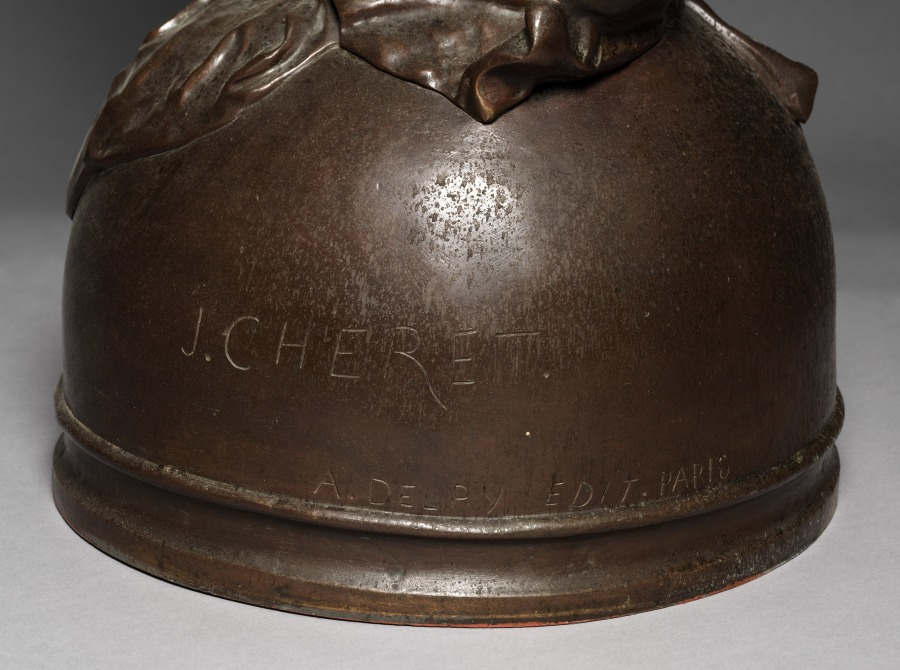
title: Dawn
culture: France, 19th century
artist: Gustave-Joseph Chéret (French, 1838–1894)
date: c. 1883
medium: bronze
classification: Sculpture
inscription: signed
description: This sculpture is of the same design as one exhibited by Chéret at the Paris Salon of 1883.